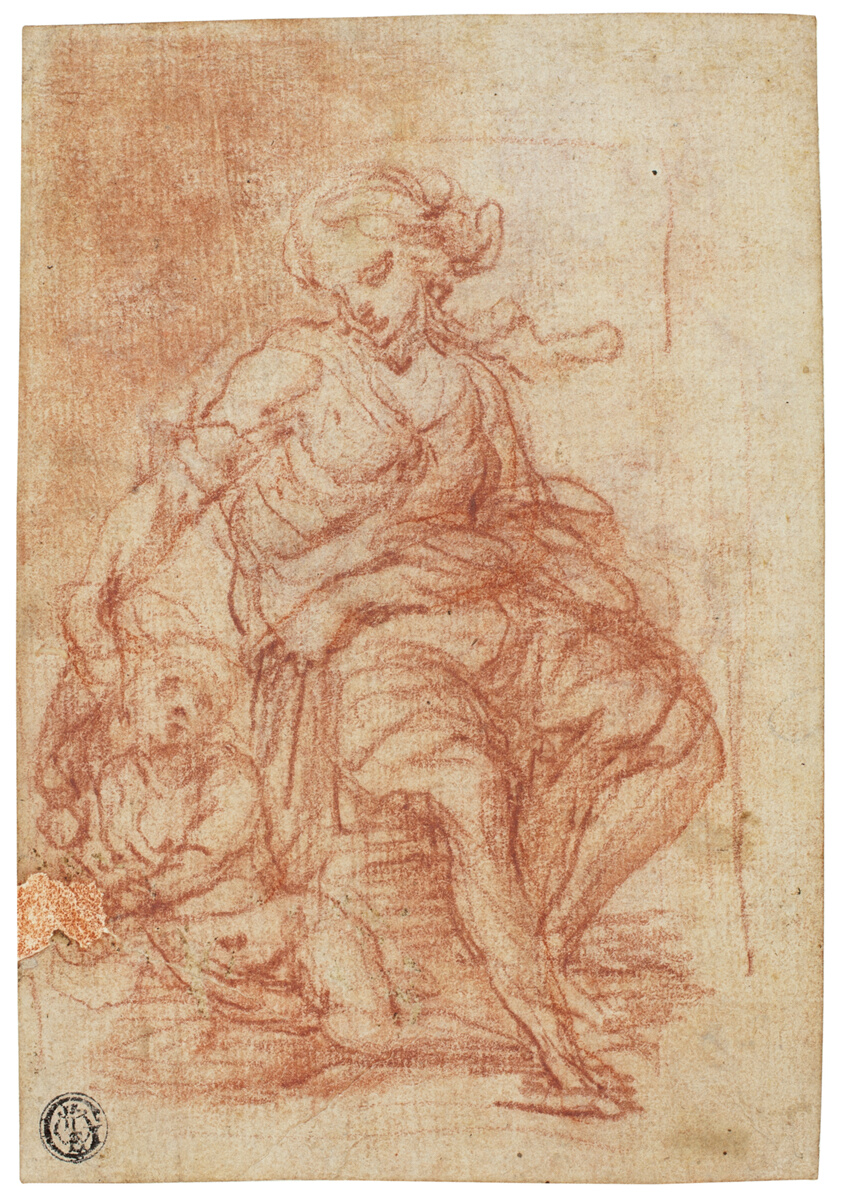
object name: Drawing and Watercolor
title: Seated Mother and Child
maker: Attributed to Alessandro Casolani (Italian, 1552-1606); or possibly Circle of Giovanni Antonio Bilivert (Italian, 1576-1644)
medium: Red chalk, on buff laid paper, laid down on ivory card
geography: Italy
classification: chalk; drawings (visual works); prints and drawing